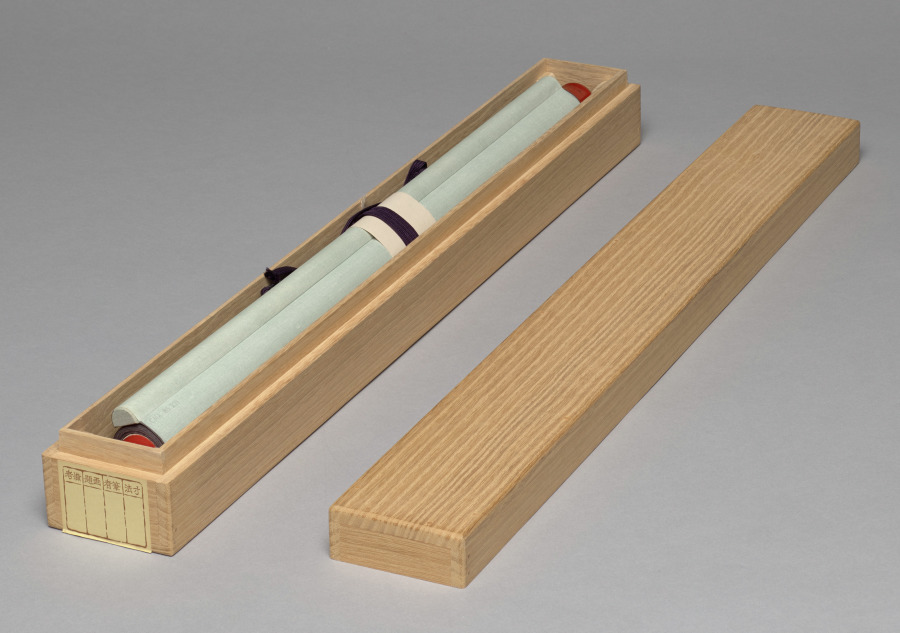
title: A Beauty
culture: Japan, Edo period (1615–1868)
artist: Gion Seitoku (Japanese, active late 1700s–early 1800s)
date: early 1800s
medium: hanging scroll; ink and color on paper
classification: Painting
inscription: 東山画奴井特寫 「字日伯立」白文方印・「せいとく」朱文千鳥印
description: A Kyoto-based ukiyo-e painter, Gion Seitoku specialized in portraying women from Gion and Shimabara, licensed brothel districts in that city. He was known for detailing faces with subtle modeling to heighten a sense of realism. During the 1700s and 1800s, wearing iridescent, greenish lip gloss made from safflower was in vogue. In addition, Japanese women almost universally practiced the custom of artificially blackening their teeth with a stain.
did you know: The person's lipstick is made from safflower.